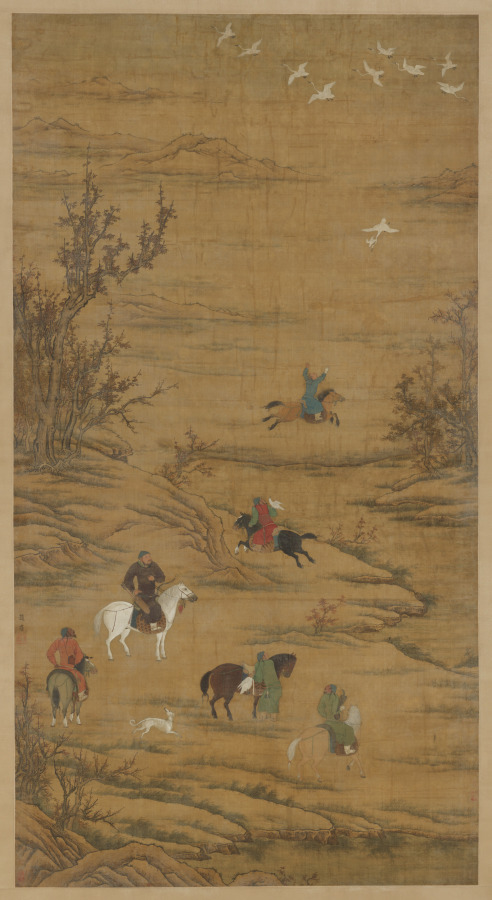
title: Hunting on Horses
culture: China, Ming dynasty (1368-1644) - Qing dynasty (1644-1911)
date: c. 1600s–1700s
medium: Hanging scroll; ink and color on silk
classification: Painting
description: This large-scale hanging scroll depicts a party hunting for waterfowl along a riverbank in the springtime. The leader is distinguished from the other five mounted hunters by his purple robe with golden dragon patterns and his white horse with a red tassel. He and his horse maintain still, dignified postures as a small white falcon captures one of the wild geese. Equestrian pursuits and hunting were particularly popular among the Khitan (also spelled “Qidan”) and Jurchen, ethnic groups who lived along China’s northeastern border. Their nomadic lifestyle intrigued the Chinese court and inspired Chinese artists to develop a painting genre showing them hunting.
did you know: This falconry scene includes one white hunting dog and four trained hunting birds.